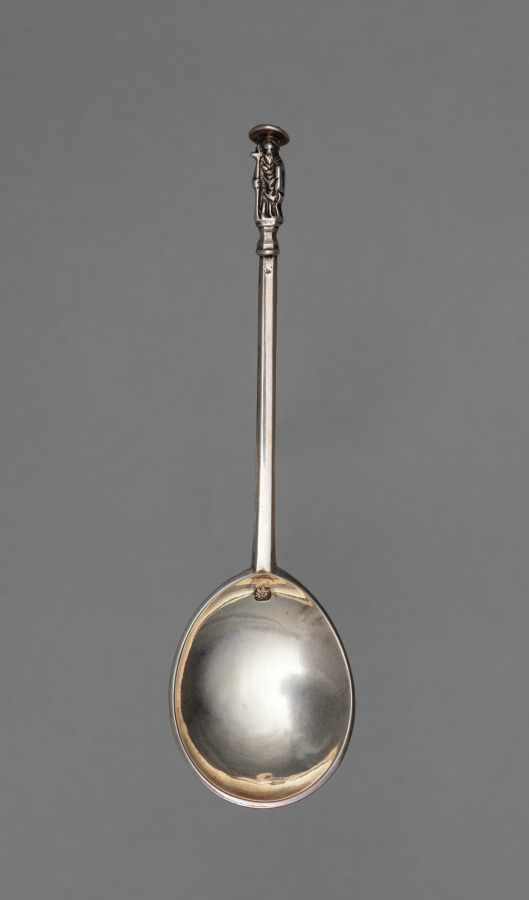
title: Apostle Spoon: St. James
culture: England, London, 17th century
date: 1634–1634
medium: silver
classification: Silver